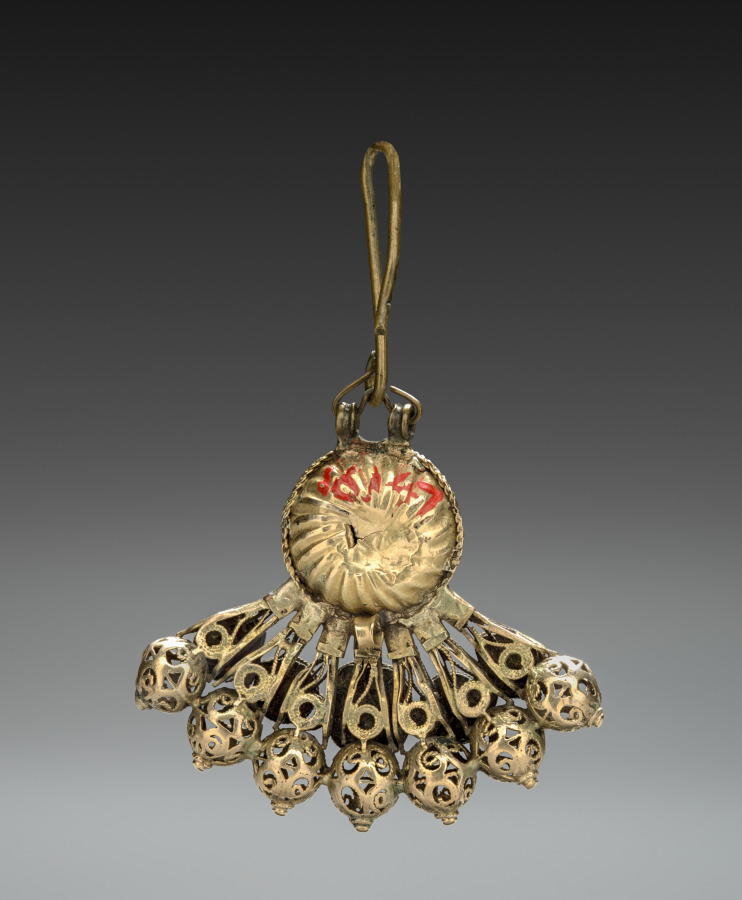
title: Earring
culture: Hungary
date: 1700s–1800s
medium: silver gilt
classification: Jewelry